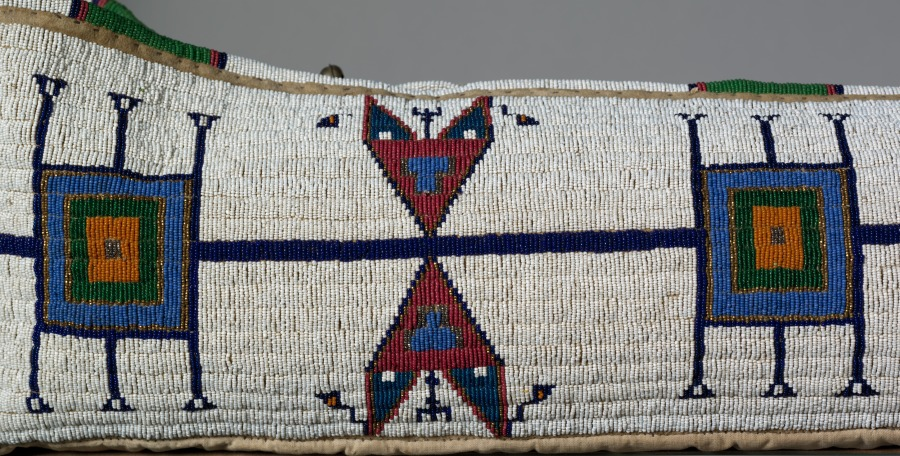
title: Cradle or Baby Carrier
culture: Native North America, Plains, Lakota (Sioux)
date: c. 1900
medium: Native-tanned hide, cotton cloth, glass beads, metal beads, brass bell, sinew thread, cotton thread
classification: Leather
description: Many Plains peoples hold lavishly quilled or beaded cradles in high esteem—they bestow spiritual benefits on the infant and prestige and honor on the family and the maker, usually a female relative. Indeed, today and in the past, creating such a cradle is often regarded as equal to counting coup, the ultimate act of male bravery in which a warrior touches an enemy with a stick known as a coup stick. This cradle was held in the arms; others have wooden frames that can be propped against a support, such as a sofa or a tree, to ease the baby’s socialization into the community.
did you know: In the past, young Plains children spent much of their time in cradles, which remain in occasional use today.